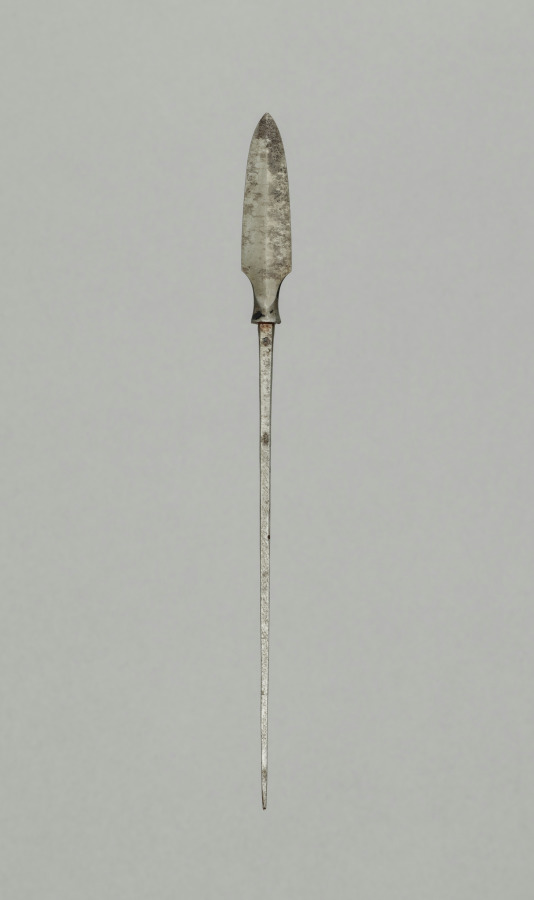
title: Arrow Point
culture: Japan, Edo period (1615–1868)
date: 1700s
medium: steel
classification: Arms and Armor